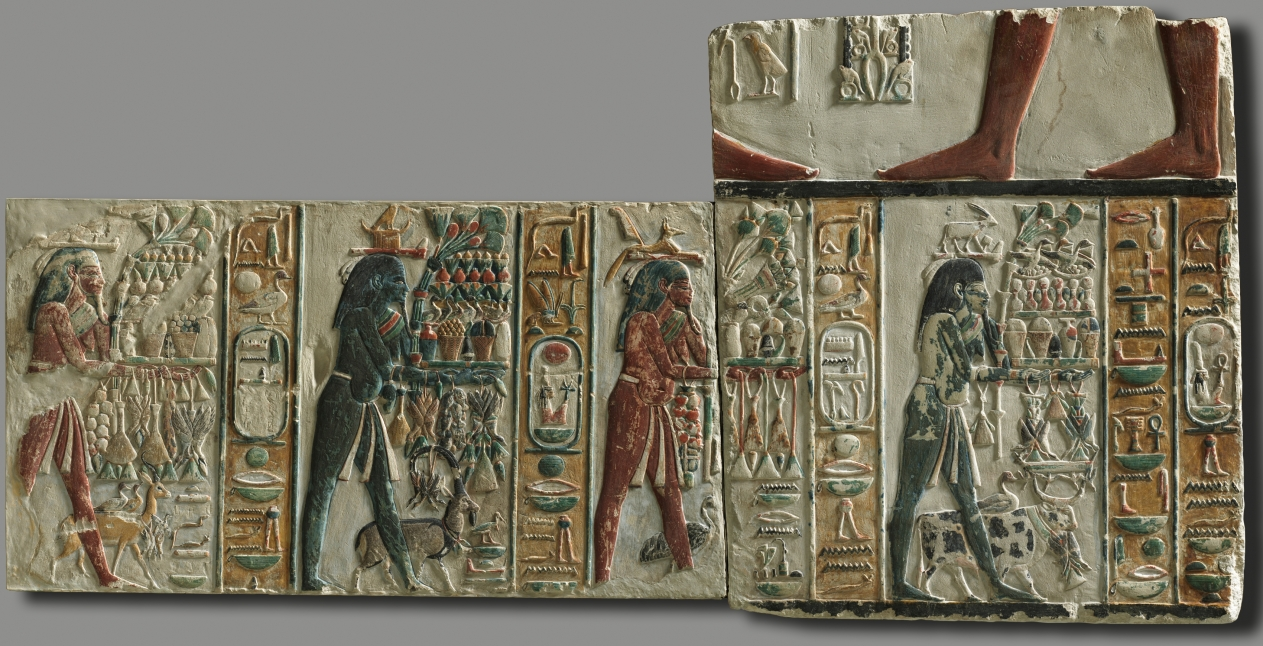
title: Nome Gods Bearing Offerings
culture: Egypt, New Kingdom (1540–1069 BCE), Dynasty 18, reign of Amenhotep III (1390–1352 BCE)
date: c. 1391–1353 BCE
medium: painted limestone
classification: Sculpture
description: These blocks from a temple wall have preserved their original painted decoration to a remarkable degree. The four portly figures in the lower register bear emblems on their heads identifying them as nomes, or provinces, of ancient Egypt. Carrying trays heaped with offerings and leading sacrificial animals, they personify the bounty of the land. First (on the right) is the Oryx Nome, followed by the Dog Nome, the Falcon Nome, and the Double Scepter Nome. The face of each nome figure is a miniature portrait of Amenhotep III, and each recites a speech in the king's name. The first figure says, "King Nebmaatra [Amenhotep III] has come, bringing to you every good thing that is in this land, that you may give him all life, stability, dominion, and all health from you." The second, third, and fourth figures bring "all greens," "the produce of the Two Lands [Upper and Lower Egypt]," and "all offerings and provisions." The god to whom the nomes bring offerings stood in the fragmentary upper register, facing a standing figure of the king, Amenhotep III. The pair of legs on the right belonged to the god; the single foot on the left belonged to the king. The god held a scepter, forked at the bottom, embellished with coils of rope (for eternity), tadpoles (for hundreds of thousands), and notched palm ribs (for years), the whole signifying "an eternity of hundreds of thousands of years." These blocks may be from Amenhotep III's temple at Kom el-Ahmar, ancient Hebenu, in Middle Egypt, dedicated to the god Horus. Hebenu was the capital of the Oryx Nome, which leads the procession of nome gods. Amenhotep III's temple was later dismantled, and its blocks were reused in the foundations of another structure, which would account for the excellent preservation of the paint.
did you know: Another block from the same temple wall was acquired 15 years earlier by the museum.